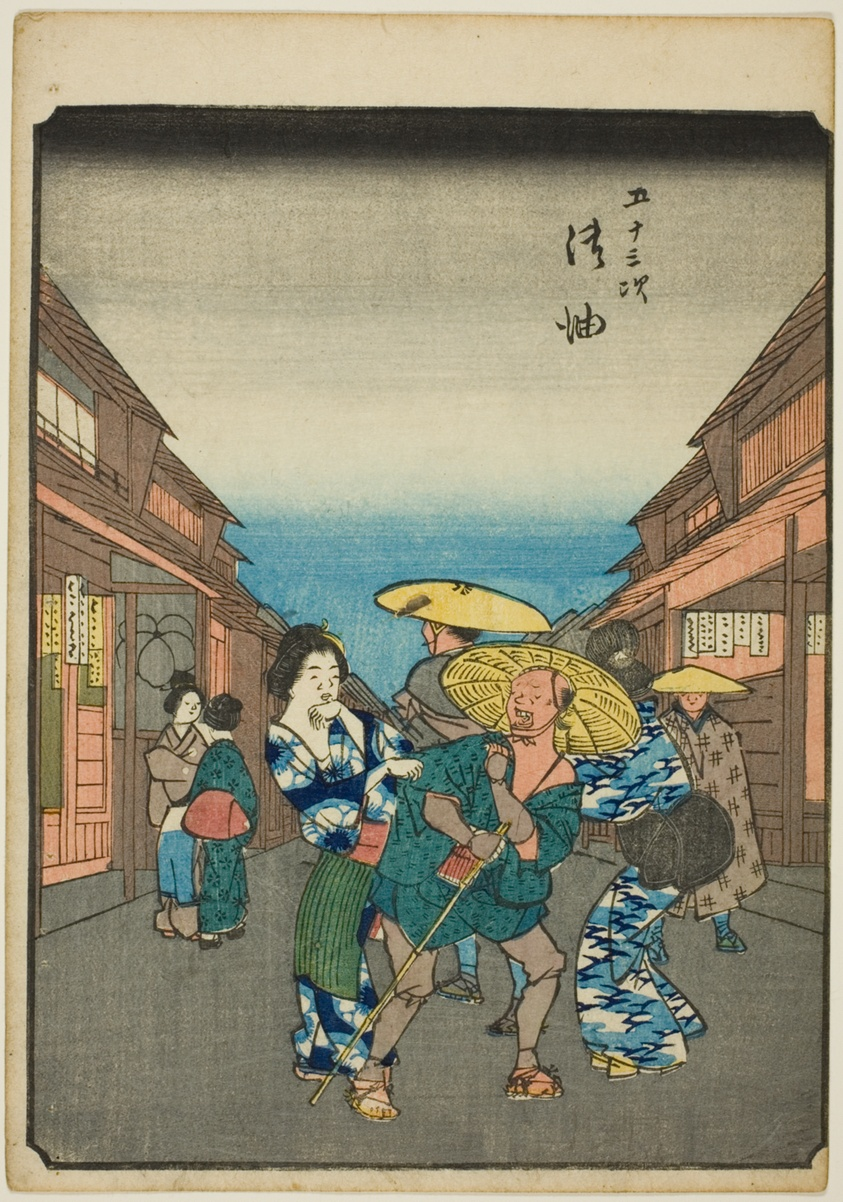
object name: Print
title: Goyu, from the series "Fifty-three Stations [of the Tokaido] (Gojusan tsugi)," also known as the Figure Tokaido (Jinbutsu Tokaido)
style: Japanese (culture or style)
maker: Utagawa Hiroshige 歌川 広重; Japanese, 1797-1858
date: 1852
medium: Color woodblock print; chuban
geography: Japan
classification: woodblock print; print